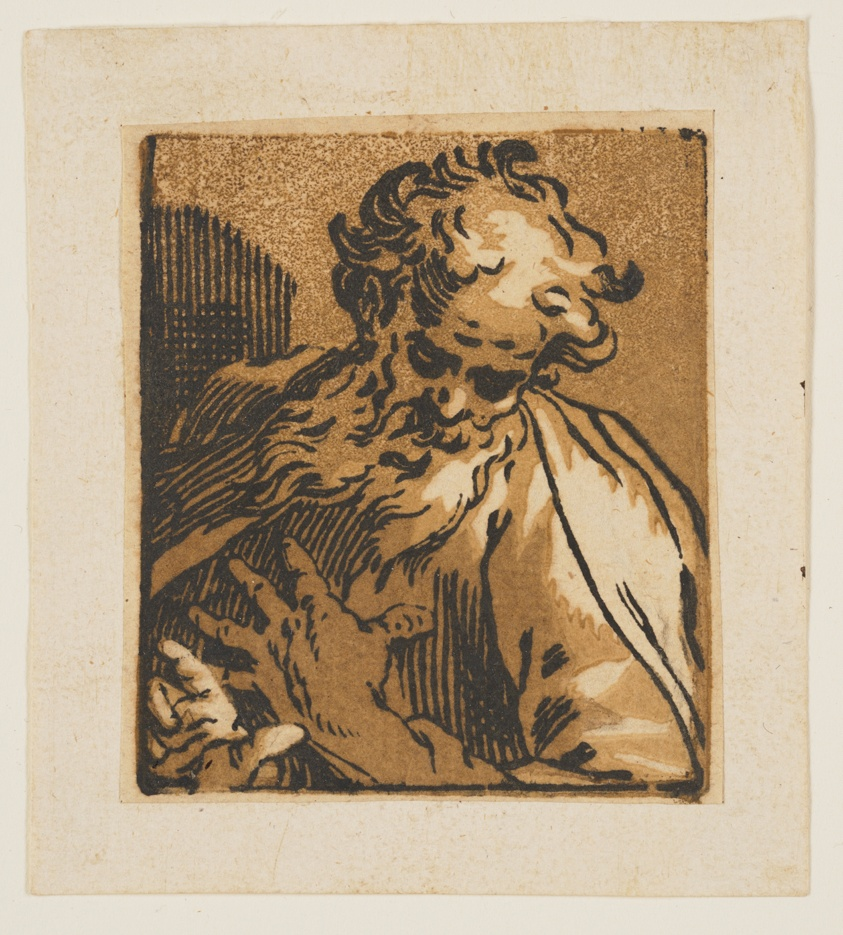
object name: Print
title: St Jerome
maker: Attributed to Ludolph Büsinck (German, c. 1590-after 1643); after Abraham Bloemaert (Dutch, 1566–1651)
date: c. 1620-23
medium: Chiaroscuro woodcut from three block on ivory laid paper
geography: Netherlands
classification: print; paper; prints and drawing; chiaroscuro woodcut